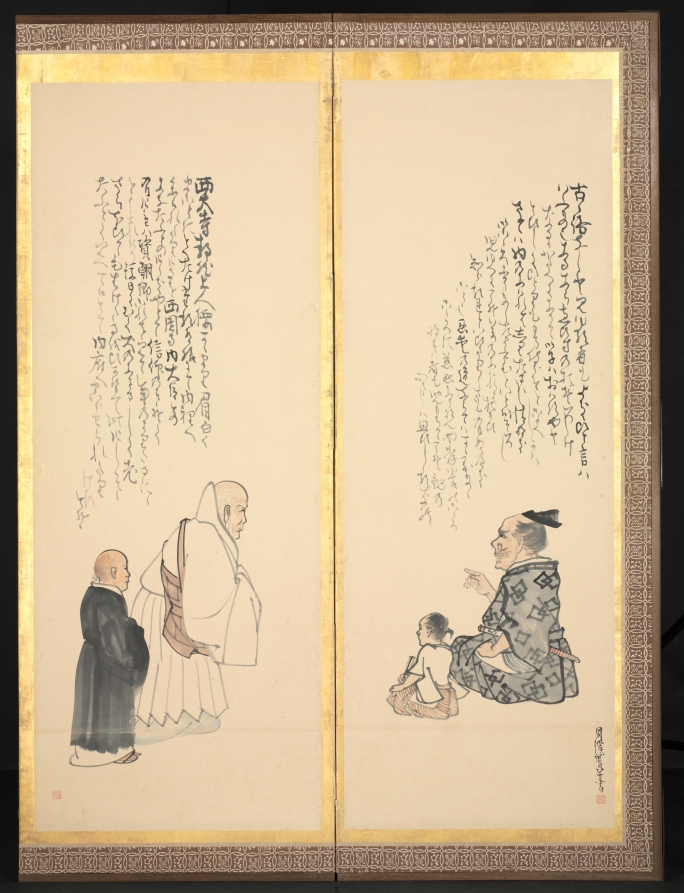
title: Scenes from Essays in Idleness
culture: Japan, Edo period (1615–1868)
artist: Matsumura Goshun (Japanese, 1752–1811)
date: late 1700s–early 1800s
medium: One of a pair of six-panel folding screens; ink and color on paper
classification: Painting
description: Matsumura Goshun inscribed passages from Buddhist monk Yoshida Kenkō’s (1283–1350) well-known collection of anecdotes, Essays in Idleness, across the top of the panels of this screen and its pair. Goshun illustrated the narratives with his vision of the figures who feature in them. The texts cascade down from right to left, forming unique compositional relationships with the images below. The episodes offer a veritable portrait of human idiosyncrasy, from one man’s deep faith in radishes to another’s inability to avoid nicknames.